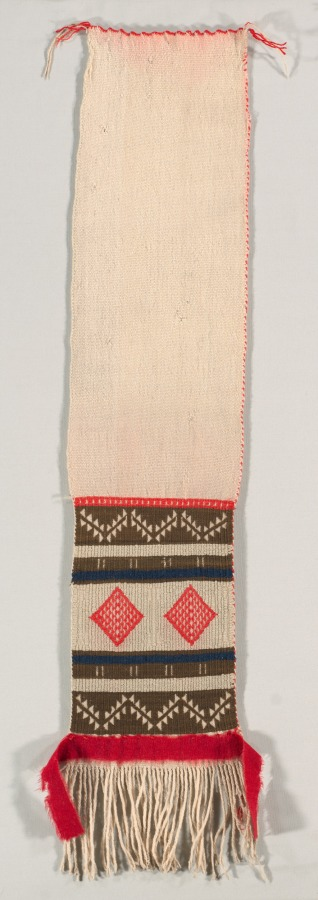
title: "Hopi Brocade" Style Dance Sash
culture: America, Native North American, Southwest, Pueblo (Hopi), Post-Contact, Late Classic Period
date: c. 1874–1885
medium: plain weave with supplementary weft wrap; wool (handspun, Germantown, and bayeta)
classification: Textile